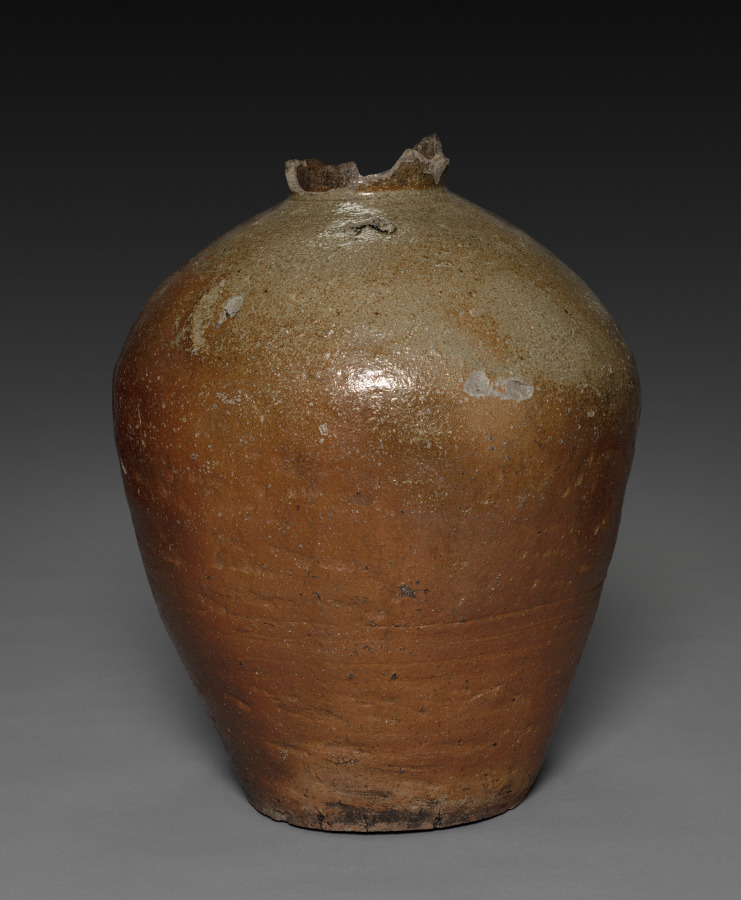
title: Storage Jar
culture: Japan, Muromachi period (1392–1573)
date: 1400s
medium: Stoneware with natural ash glaze (Tamba ware)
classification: Ceramic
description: For centuries the Tokai region surrounding present-day Nagoya has been an especially fertile ceramic production center. One site was a group of kilns located west of Kyoto, in Tamba province. Nestled in a farming valley in the mountains behind the modern port of Kobe, Tamba required a regular supply of storage vessels and sturdy containers for distributing grain. This jar was formed in three sections, each fluted to the next and turned on a potter's wheel to scrape off excess material. Both interior and exterior walls were smoothed with a wooden or bamboo tool, leaving markings on the lower body and shoulder. The neck opening is small and wheel-turned, as is the neck, which bears fine lines and a matte-glazed surface. The lustrous green glaze that highlights the jar once trailed from the vessel's lip and clung to the entire shoulder wall, mingling with the warm, orange-brown tone of the clay body underneath. The surface is crackled with craters where stone material within the clay migrated up to the surface during firing and then fell away. The result is a particularly rich and varied "landscape," typical of Tamba ware's subdued, earthy vitality.